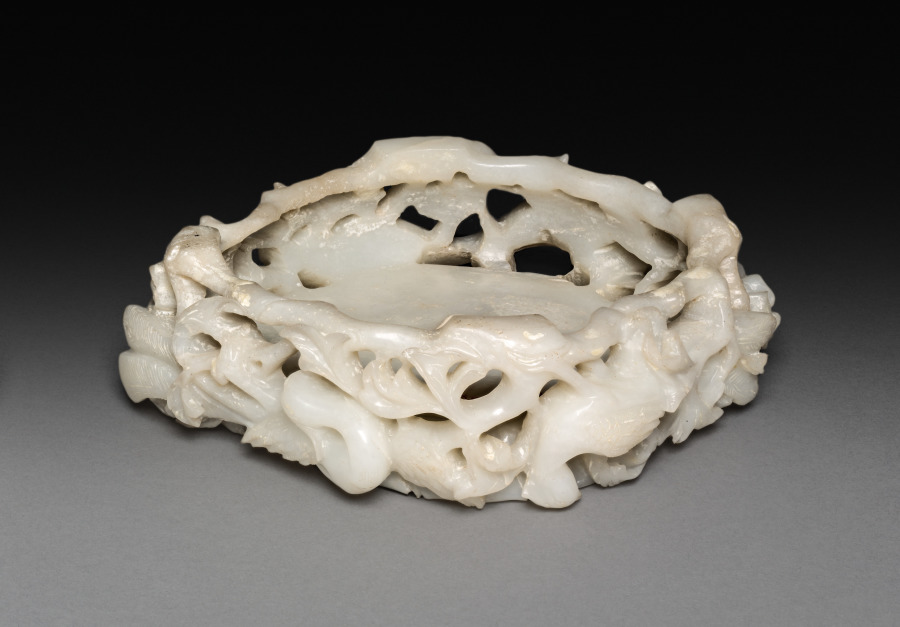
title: Three-Sectional Altar Group: Koro (upper section of base)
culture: China, Qing dynasty (1644-1911)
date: 1644–1911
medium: jade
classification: Jade